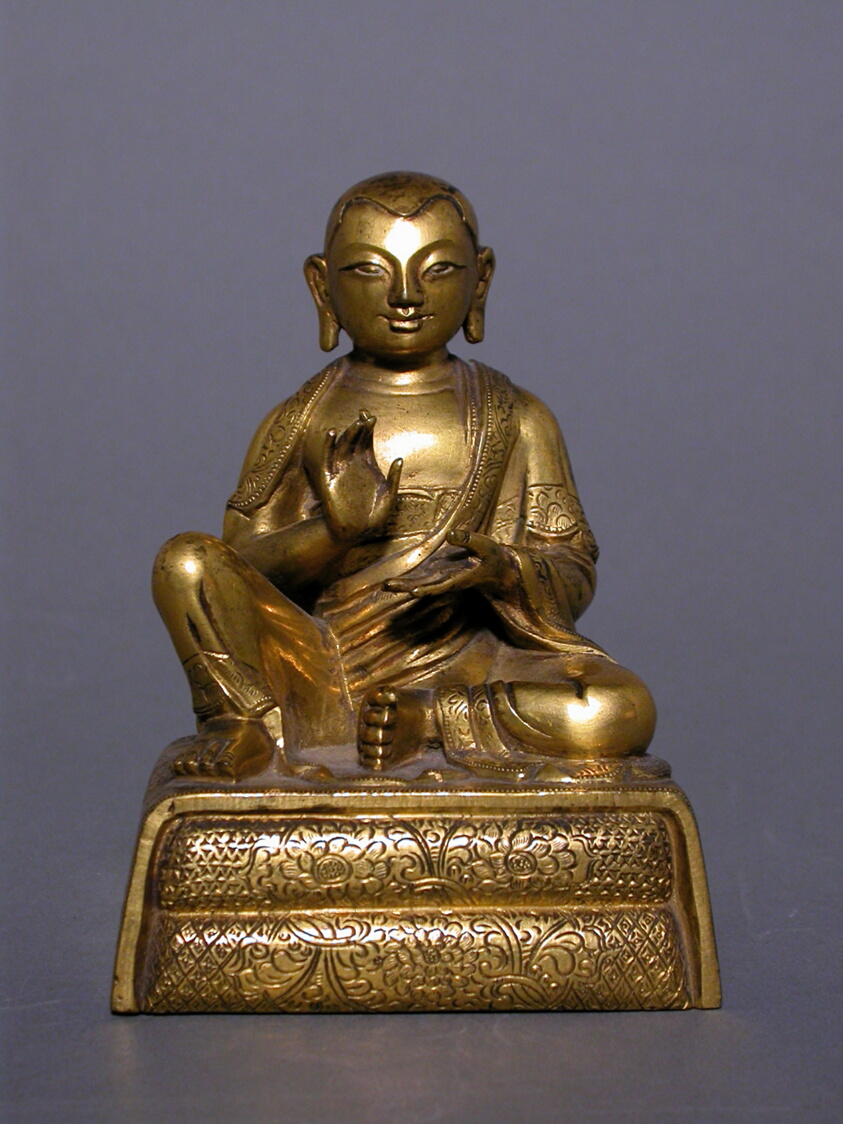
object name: Sculpture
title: Luohan (Arhat)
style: Chinese (culture or style)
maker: China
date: Qing dynasty (1644–1911), 18th century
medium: Brass alloy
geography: China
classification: brass; metal; sculpture; asian art